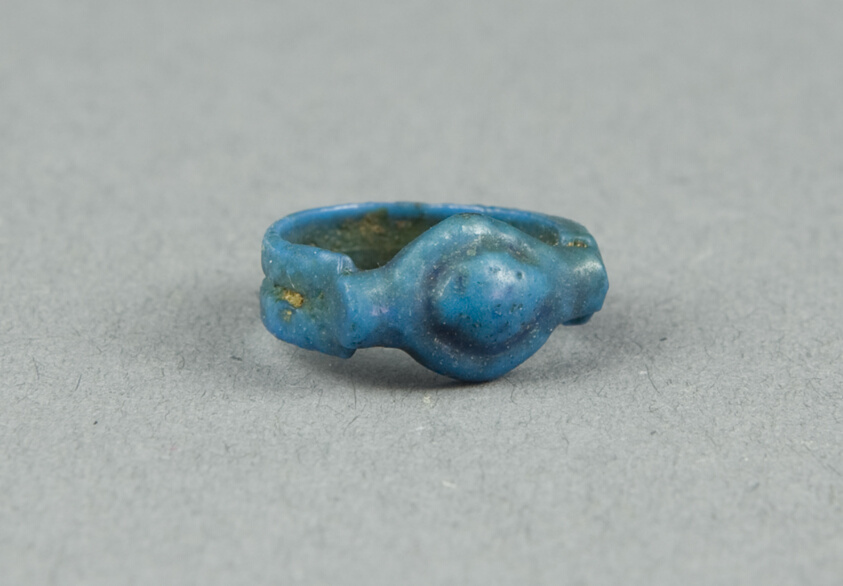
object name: Costume and Accessories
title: Ring: Oval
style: egyptian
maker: Egyptian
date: New Kingdom, Dynasty 18 (about 1350 BCE)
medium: Faience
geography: Egypt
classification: ring (jewelry); ceramics; jewelry; ancient art; costume; faïence (composite material)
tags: circles